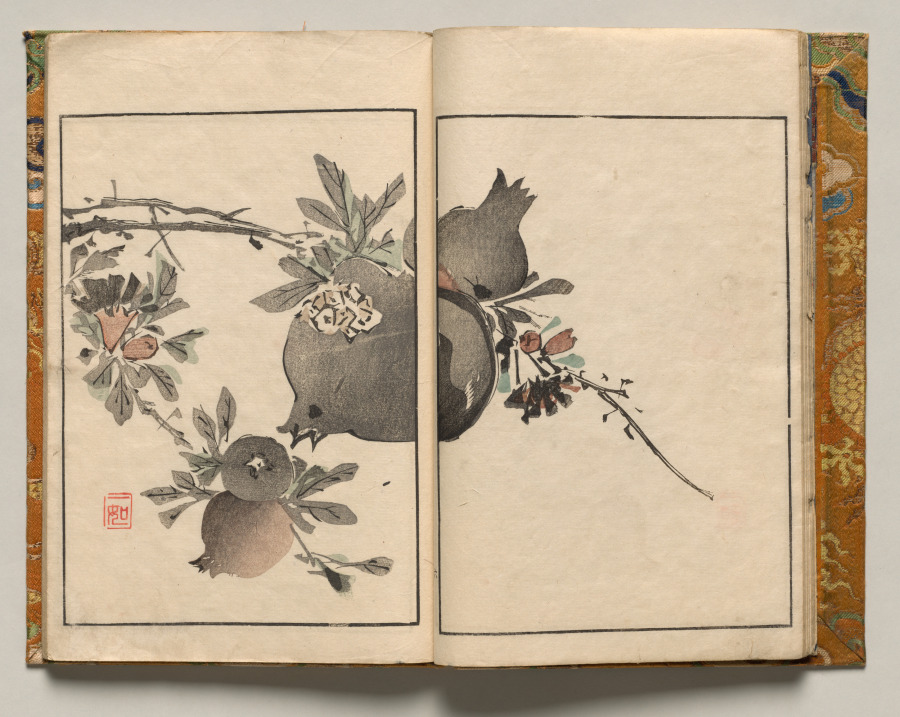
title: Pomegranate, Design Six from Shazanrō Picture Book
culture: Japan, Edo period (1615–1868)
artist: Tani Bunchō (Japanese, 1763–1841)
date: 1816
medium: woodblock-printed book; ink and color on paper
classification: Bound Volume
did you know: Shazanrō was one of Tani Bunchō's style names.